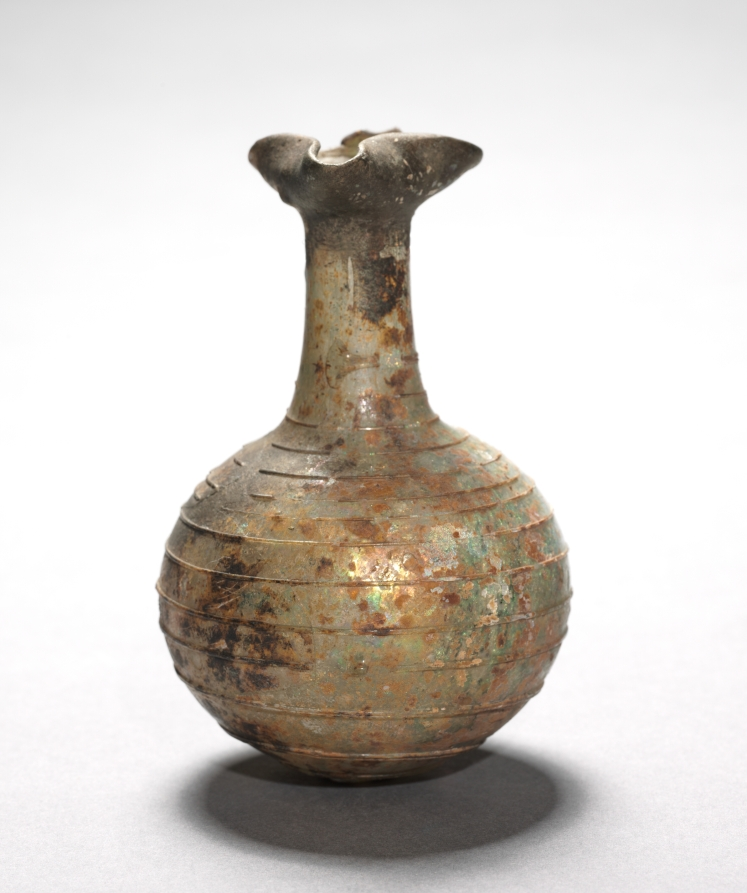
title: Pitcher with Handle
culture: Roman, Eastern Mediterranean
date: 100–400 CE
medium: glass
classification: Glass